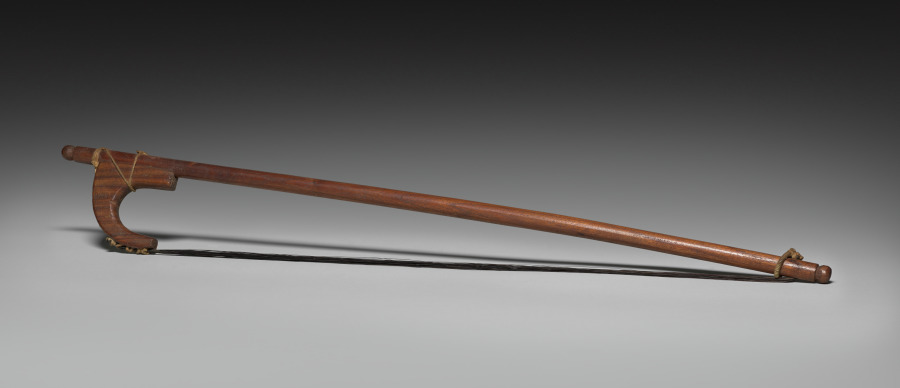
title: Bow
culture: India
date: 1800s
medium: Wood, horsehair, and jute fiber cord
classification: Musical Instrument